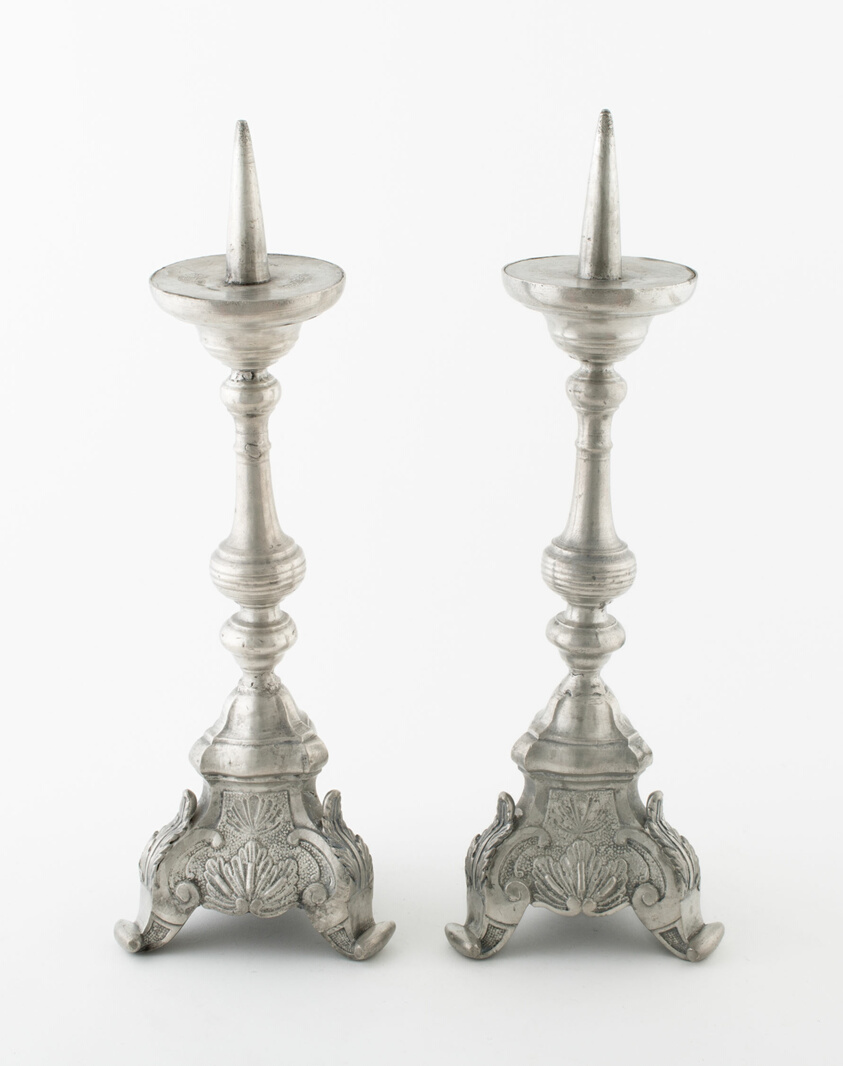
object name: Metalwork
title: Candlestick (one of a pair)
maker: P. J. Joiris; Belgian, 19th century; Belgium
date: 19th century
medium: Pewter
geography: Liège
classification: candleholder - candlestick; candleholder; pewter; metalwork; european decorative arts